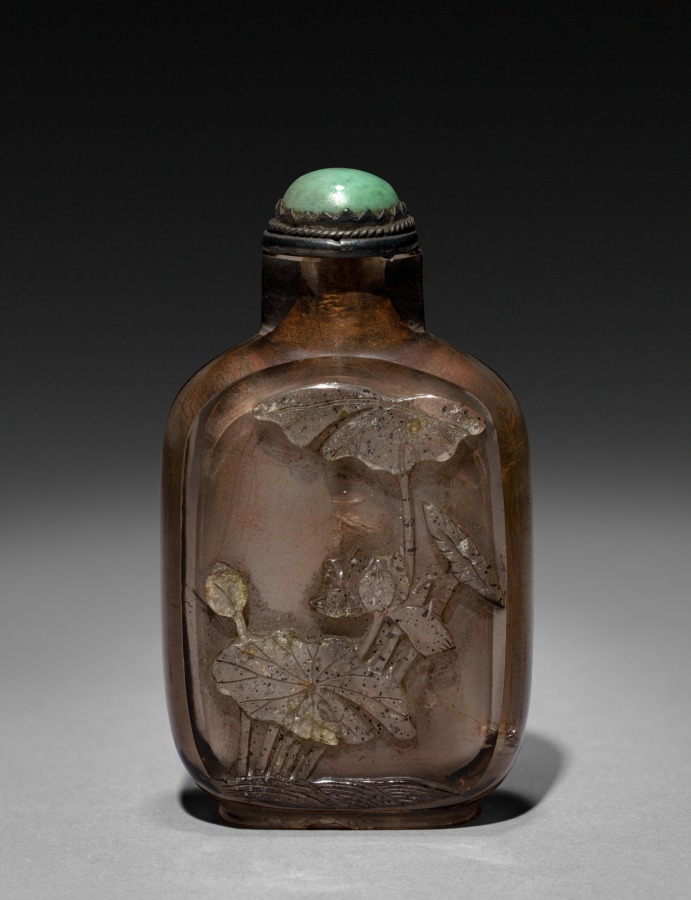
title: Snuff Bottle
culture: China, Qing dynasty (1644-1911)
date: 1644–1911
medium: glass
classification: Glass